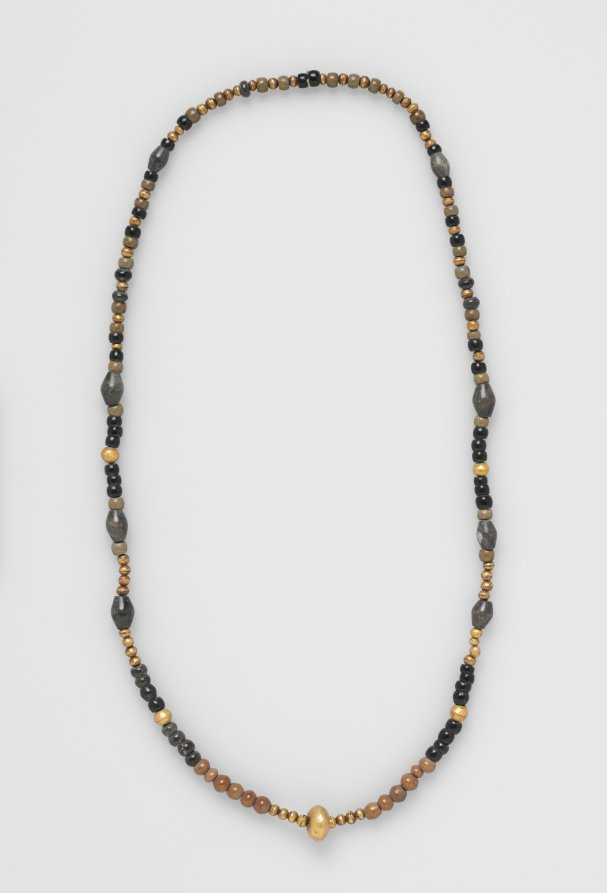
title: Necklace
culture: Peru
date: before 1532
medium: gold with gray and black polished stone beads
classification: Jewelry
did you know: These ancient beads were restrung in modern times.